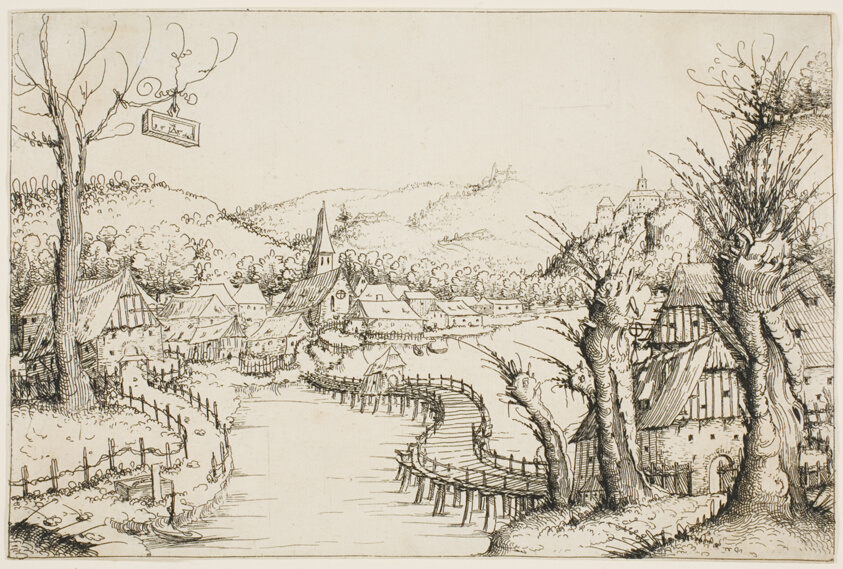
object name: Print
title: Landscape with a Curved Wooden Bridge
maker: Augustin Hirschvogel (German, 1503-1553)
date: 1546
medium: Etching in black on paper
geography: Germany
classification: etching; print; prints and drawing